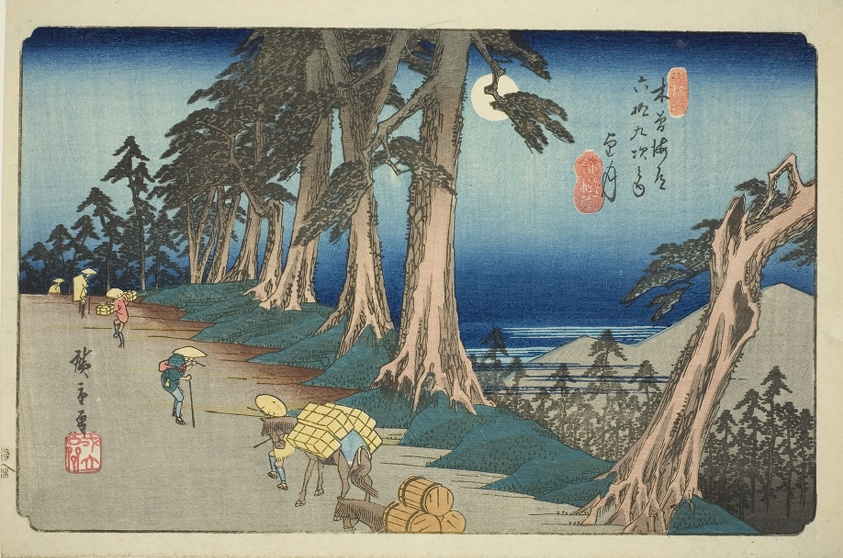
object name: Print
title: No. 26: Mochizuki, from the series "Sixty-nine Stations of the Kisokaido (Kisokaido rokujukyu tsugi no uchi)"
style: Japanese (culture or style)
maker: Utagawa Hiroshige 歌川 広重; Japanese, 1797-1858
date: c. 1835/38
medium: Color woodblock print; oban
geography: Japan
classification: woodblock print; print; asian art